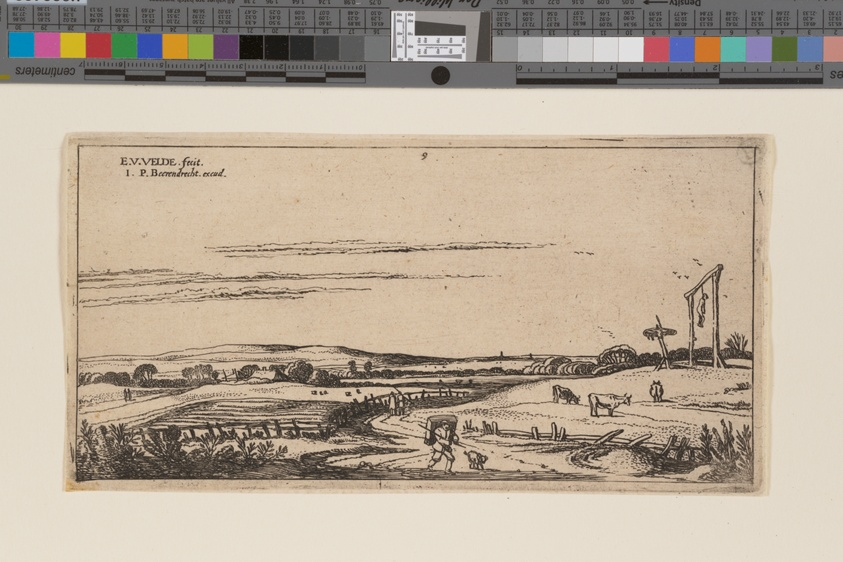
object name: Print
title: Landscape with Gallows (near Haarlem), from Landscapes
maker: Esaias van de Velde; Dutch, 1587–1630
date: c. 1610-1630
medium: Etching on ivory laid paper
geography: Netherlands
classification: etching; paper; print; prints and drawing